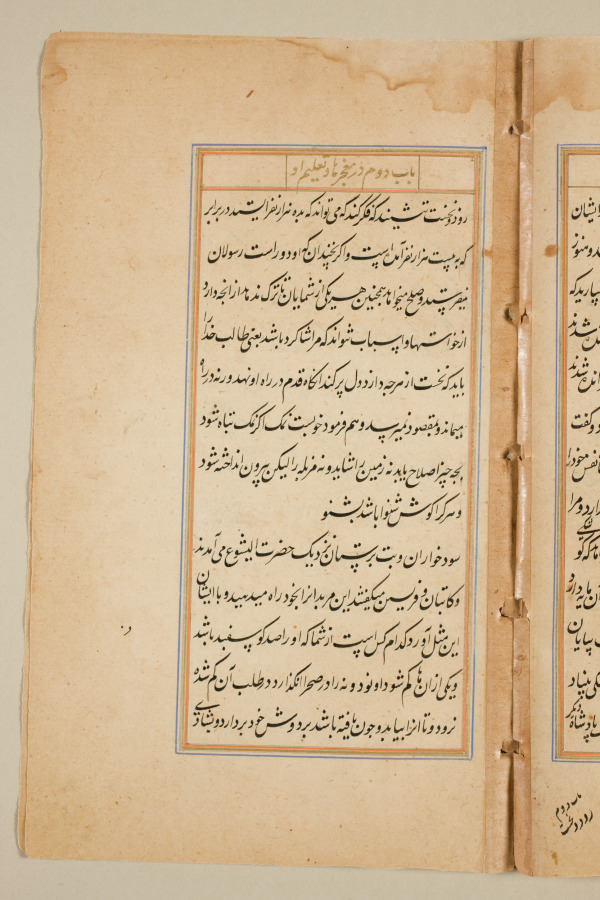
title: Text page from a Mirror of Holiness (Mir’at al-quds) of Father Jerome Xavier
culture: Mughal India, Allahabad, made for Prince Salim (1569–1627)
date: 1602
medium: Ink and gold on paper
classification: Manuscript